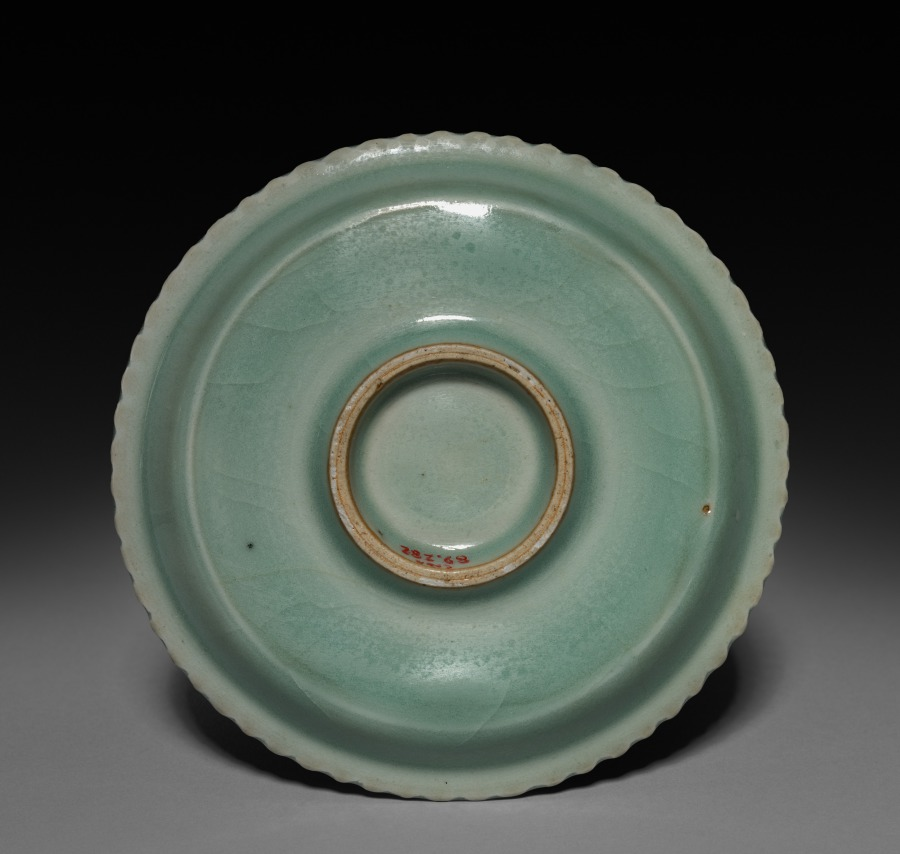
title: Dish with Flying Crane and Clouds in Relief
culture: China, Zhejiang province, Yuan dynasty (1271-1368)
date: 1300s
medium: Glazed porcelain with molded decoration, Longquan ware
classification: Ceramic